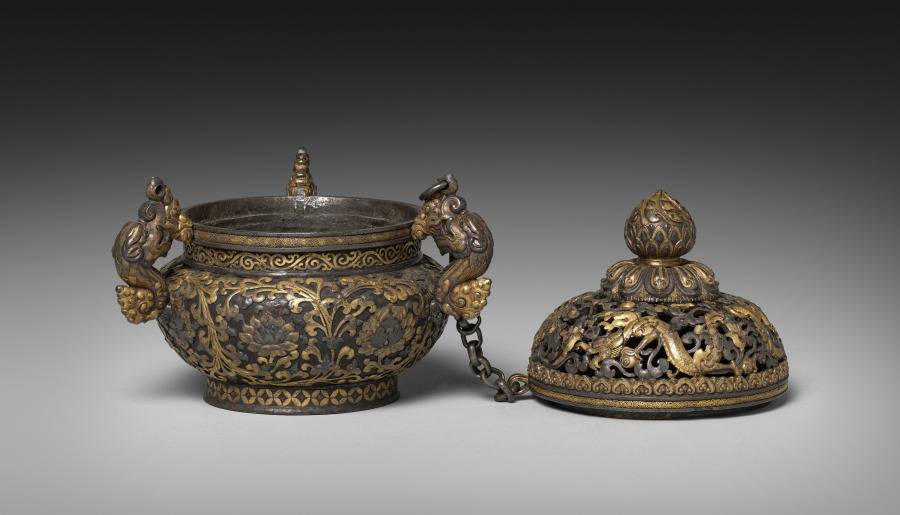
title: Incense Burner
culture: China, Yongle Period (1403-1424)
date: early 1400s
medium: iron inlaid with gold and silver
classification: Metalwork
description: This incense burner with gold and silver inlay has three dragon-head handles. Its main body is decorated with flowers placed in round fields formed by a winding creeper. The perforated cover is decorated with a dragon. The lotus bud on the top is used as a handle.